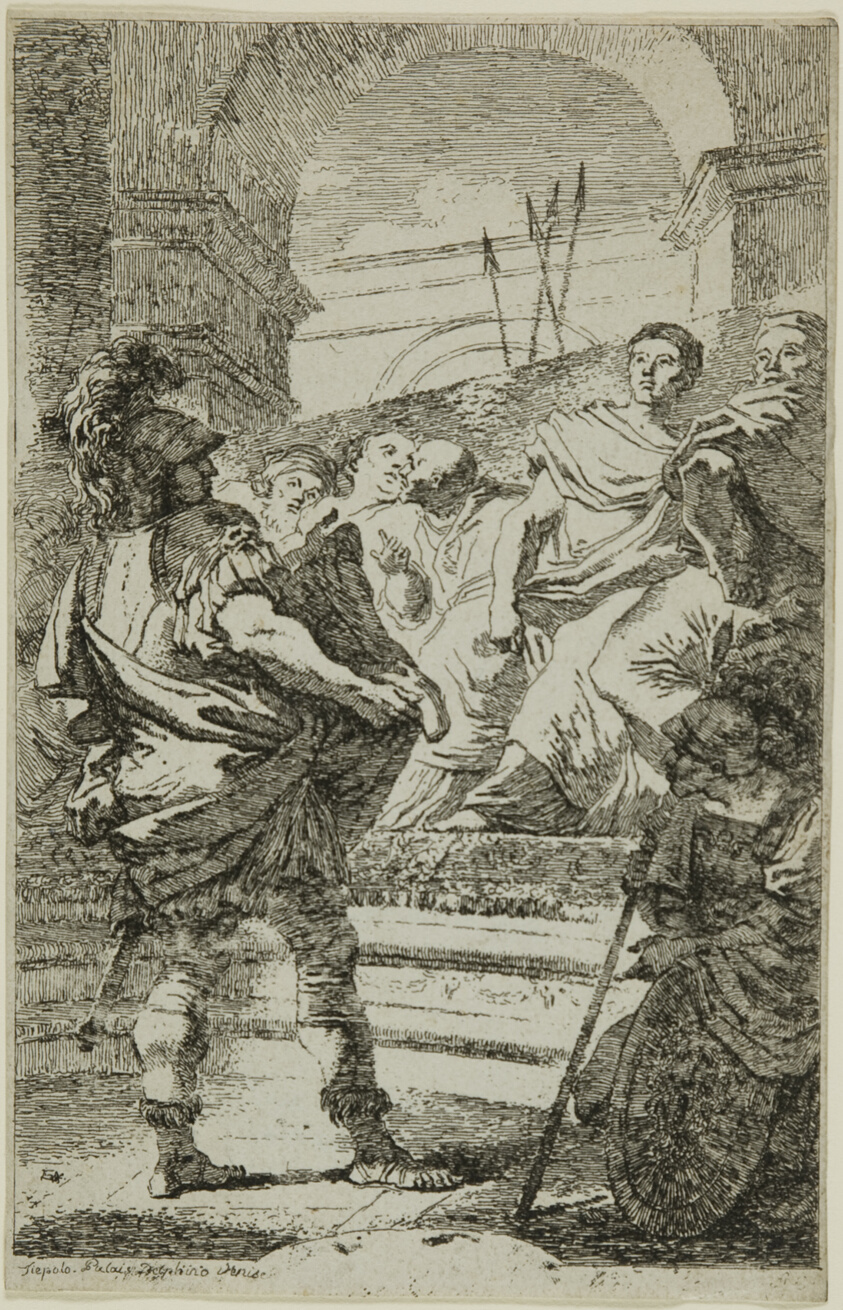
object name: Print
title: Fabius Maximus Before the Carthaginensis Senate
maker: Jean-Honoré Fragonard (French, 1732-1806); after Giovanni Battista Tiepolo (Italian, 1696-1770)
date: 1763/64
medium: Etching on cream laid paper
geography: France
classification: prints and drawing; etching; print